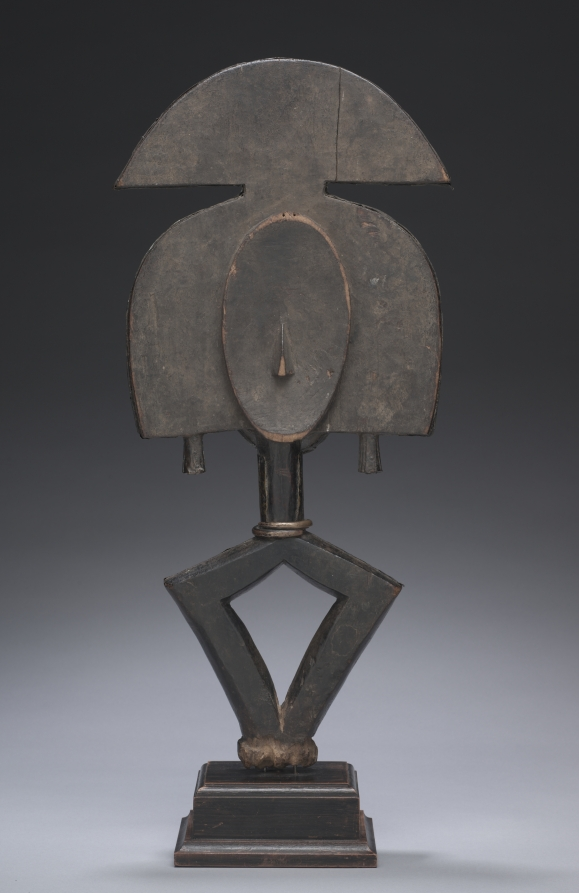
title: Sculptural Element from a Reliquary Ensemble (mbulu ngulu)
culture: Africa, Central Africa, Gabon, Kota-style maker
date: probably 1800s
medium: Wood, copper alloy, and iron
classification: Sculpture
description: The ethnic map of eastern Gabon is extremely complicated as a result of continuous migratory movements since the 17th century. Kota is the name of one of three culturally closely related people. All share the tradition of commemorating and honoring ancestors through the preservation and worship of sacred ancestral relics within cylindrical bark containers or bound in fiber packets. Covered with sheets of copper and brass, this abstract wooden human-shaped figure—distilled to a planar surface—served as a guardian set atop a basket container holding the skull, certain bones, and other relics of a deceased man. It belonged to a religious institution that honored the memory of individuals who made major contributions during their lifetime. The luminosity of the copper and brass covering was considered intimidating and spiritually empowered to deflect harm and thus protect the owner and his family.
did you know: The diamond-shaped "body" of this sculpture was originally pushed into a container of ancestral relics (bones) up to its "shoulders." Metal covers only areas of the wood that were left visible.